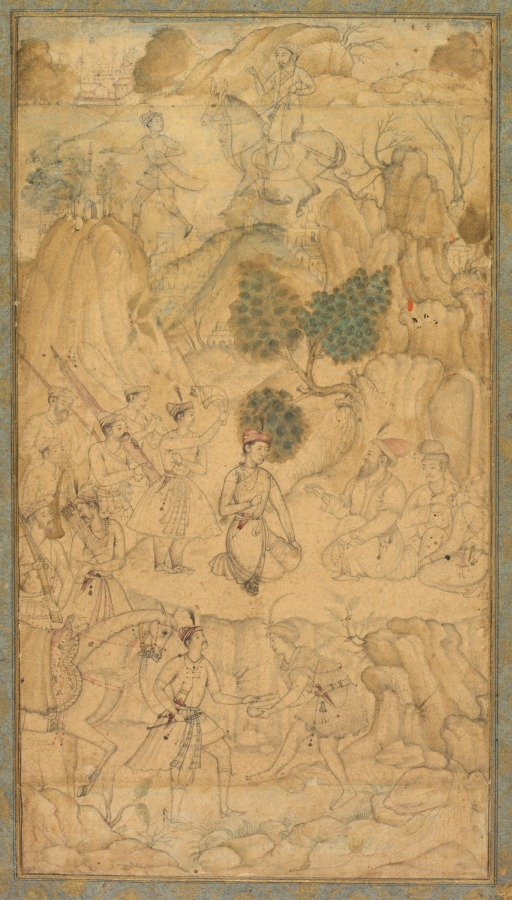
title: A prince visiting a holy man in a rocky landscape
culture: India, Mughal court, 16th century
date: c. 1590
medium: Gum tempera and gold on paper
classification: Painting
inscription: Recto: Arabic verses in nasta‘liq script: O Immutable in Your attributes!/ O Gatherer of that which is dispersed!/ You who make plants bloom;/ You who quicken the dead from decayed bones;/ You who send down succor/ From those bowing and kneeling/ To the grieving and sick/ To the hungry and famished/ From the routing and flooding,/ O Creator of the constellations,/ In the seamless heavens/ From the onset of night/ To the brightening of the light of dawn.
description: A recurring theme in the art of India is the relationship between rulers and the religious practitioners who were believed to control supernatural forces that would aid in the success of rule and war. A prince has come to the abode of a Sufi mystic dervish, who sits with two acolytes in front of a rocky cave that may be his dwelling. The dervish appears to be blessing the prince and the weapons carried by his retinue to help assure success in an upcoming battle. In the foreground, a princely figure leading a horse meets surreptitiously with an eccentric figure holding a squat vessel, possibly filled with a narcotic substance such as bhang, used by many groups of mystics to aid in reaching trance states.